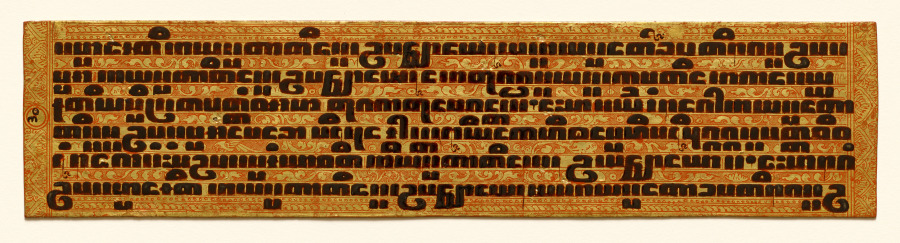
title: Text, folio 3 (verso) from a Kammavacha: Buddhist ordination text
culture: Myanmar (Burma)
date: 1800s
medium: Leaf: lacquer and gilding on cloth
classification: Manuscript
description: In premodern Burma, lay people commissioned lavishly ornamented manuscripts for ceremonial occasions, when officiants would read aloud from the text. Written in black lacquer, the text is in the language of Pali written in a Burmese script. It contains ordination rites and procedures for monastic ceremonies. The second to last page is covered with intricately drawn, winged celestial beings (nats) in gestures of praise. They fly amid intertwining vegetation—denoting bounty—that grows from serpentine forms that refer to rain clouds. Lionlike forms inhabit the space with them. The top and bottom covers are equally ornamented with jeweled floral patterning.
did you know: The Pali text of this manuscript is written in Burmese square script, which is also known as "tamarind seed script."